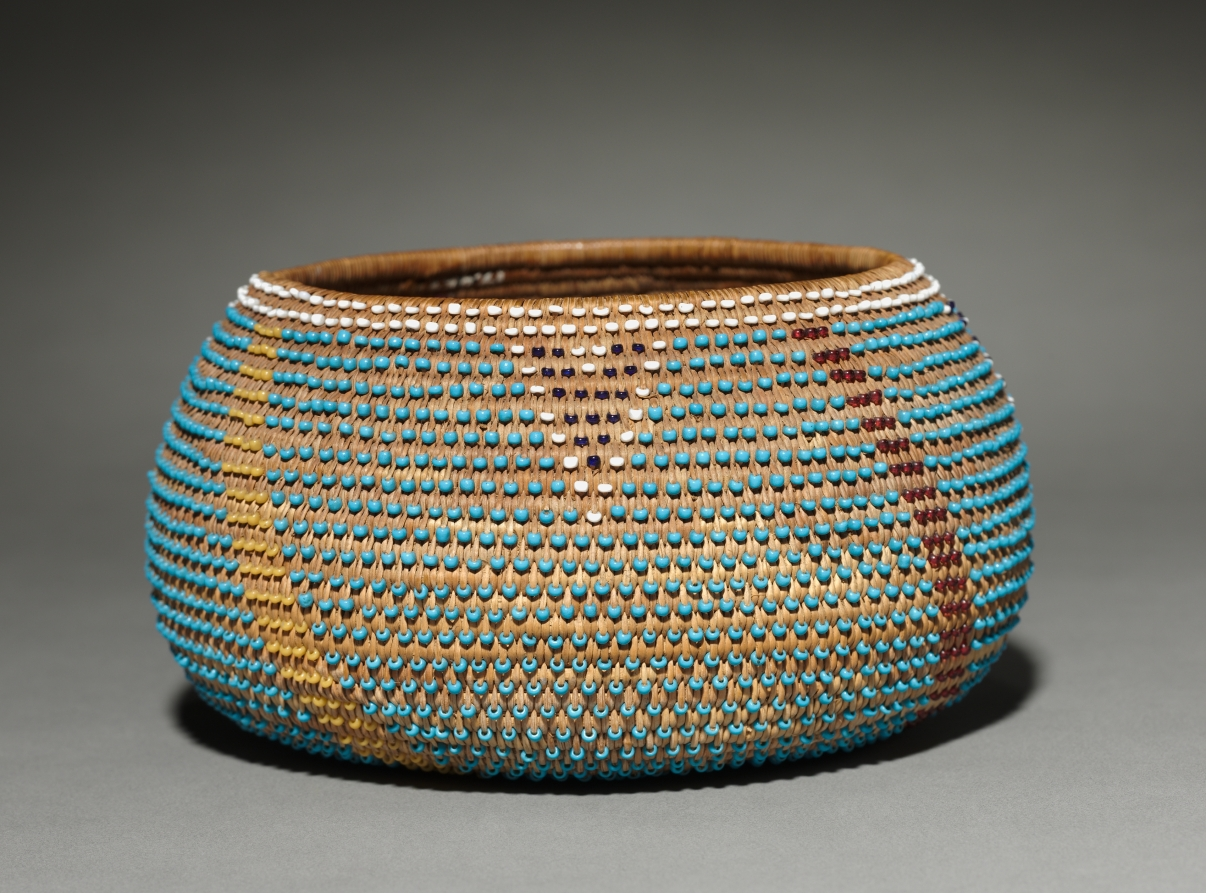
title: Gift Bowl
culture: California, Wappo, late 19th- early 20th century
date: c. 1890– 1905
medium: Sedge with beads; coiled ( 3 rods)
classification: Basketry